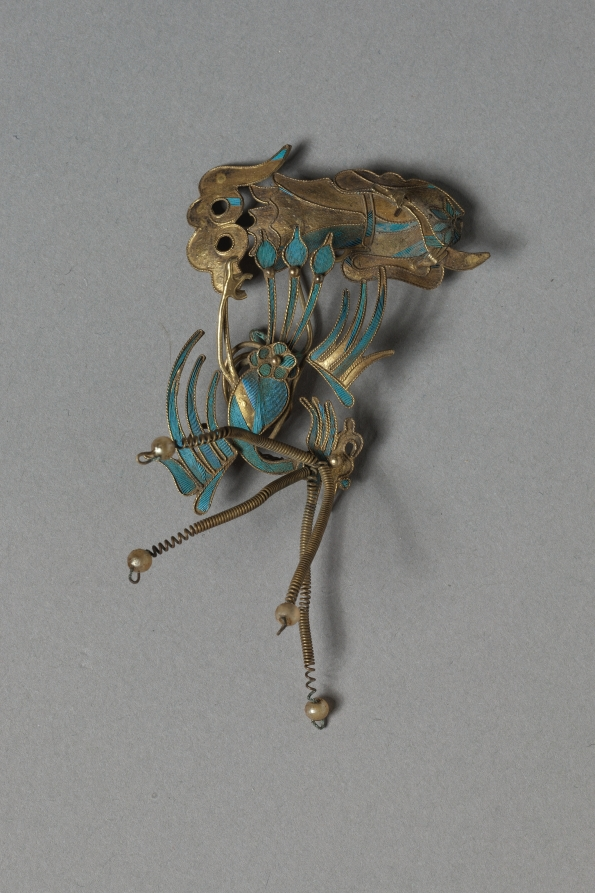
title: Headdress Ornament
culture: China, Qing dynasty (1644-1911)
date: 1700s or 1800s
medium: Copper-silver alloy, gilding, kingfisher feathers, glass beads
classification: Jewelry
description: Hair ornaments depicting flowers, butterflies, or birds were worn by ladies of the Manchu elite class.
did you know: The iridescent blue feathers of kingfisher birds are inlaid in hairpins and headdresses.